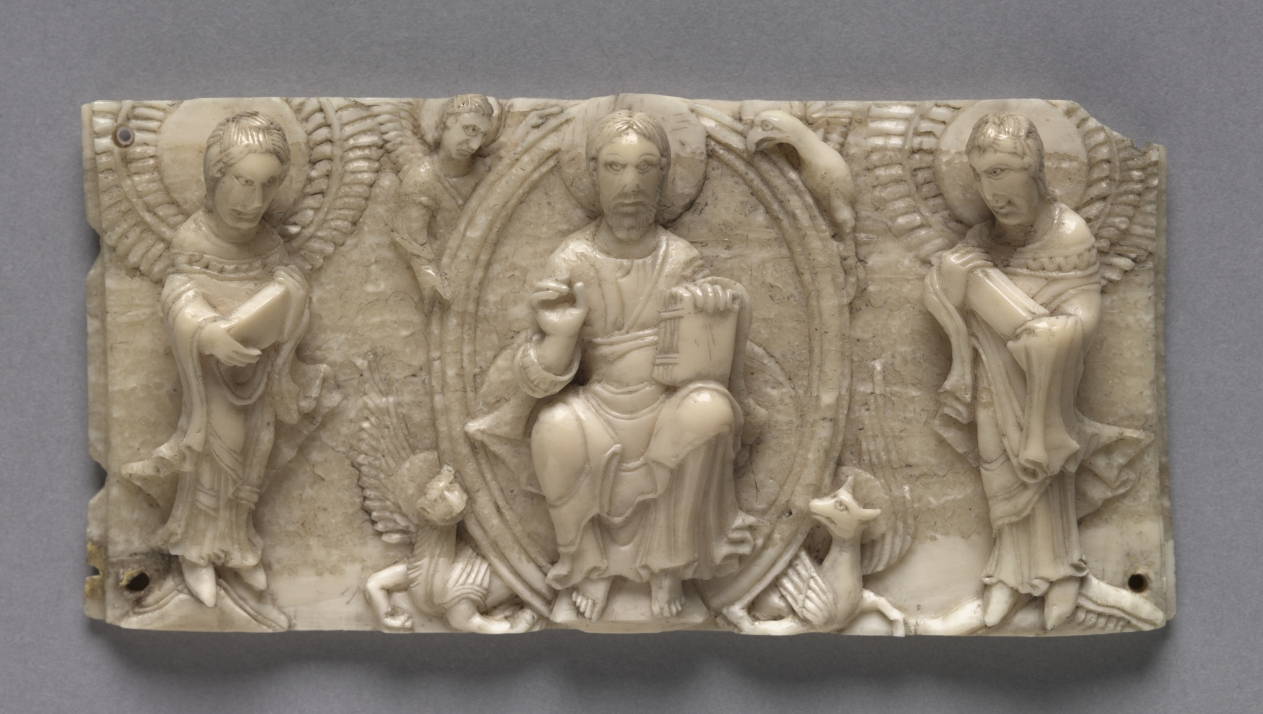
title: Plaque from a Portable Altar Showing Christ and the Apostles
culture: Germany, Lower Rhine Valley, Romanesque period, 11th century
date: 1050–1100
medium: walrus ivory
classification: Ivory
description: This intricately carved ivory panel once decorated the side of a portable altar. One of three plaques, it depicts Christ in Majesty and his apostles and were the first major acquisition of William M. Milliken, the museum's first curator of decorative arts and later director (1930–1958). As Milliken later recalled, the pieces "were immensely intriguing, monumental in scale, even if tiny in size, the Christ in the mandorla could have been enlarged and would have graced the tympanum of a great cathedral."